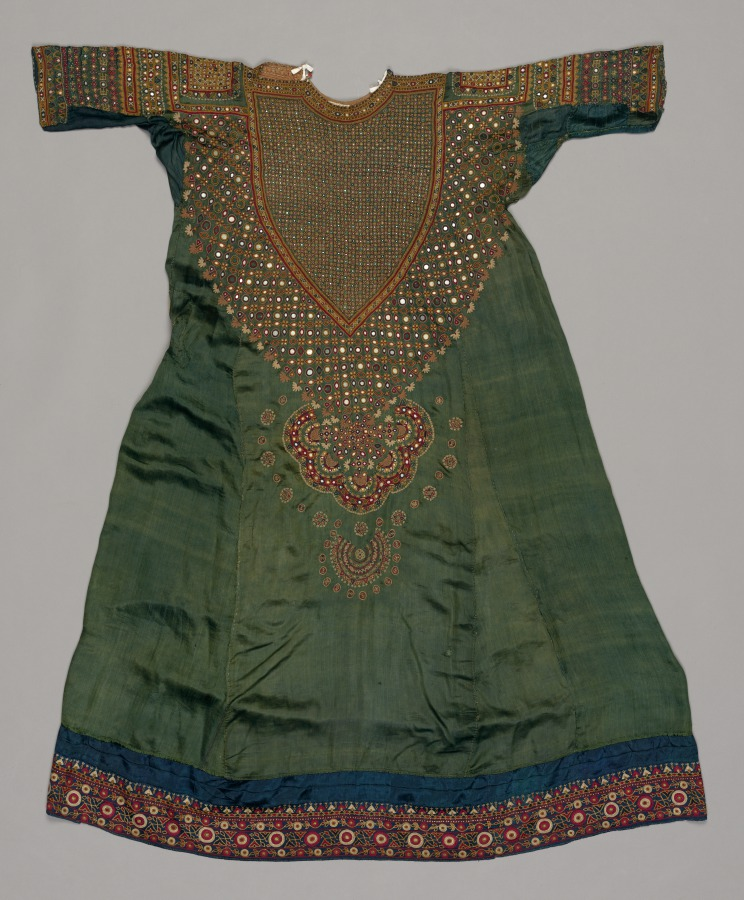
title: Jat Woman's Dress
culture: Western India, Gujarat, possibly Kutch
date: 1800s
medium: silk embellished with mirror work and embroidered with silk in open-chain, stem, basket, and running stitch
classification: Garment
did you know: Pieces of mirror, called abhla in Hindi or shisha in Persian, were favorite embellishments to embroideries and accessories in western India and Afghanistan.